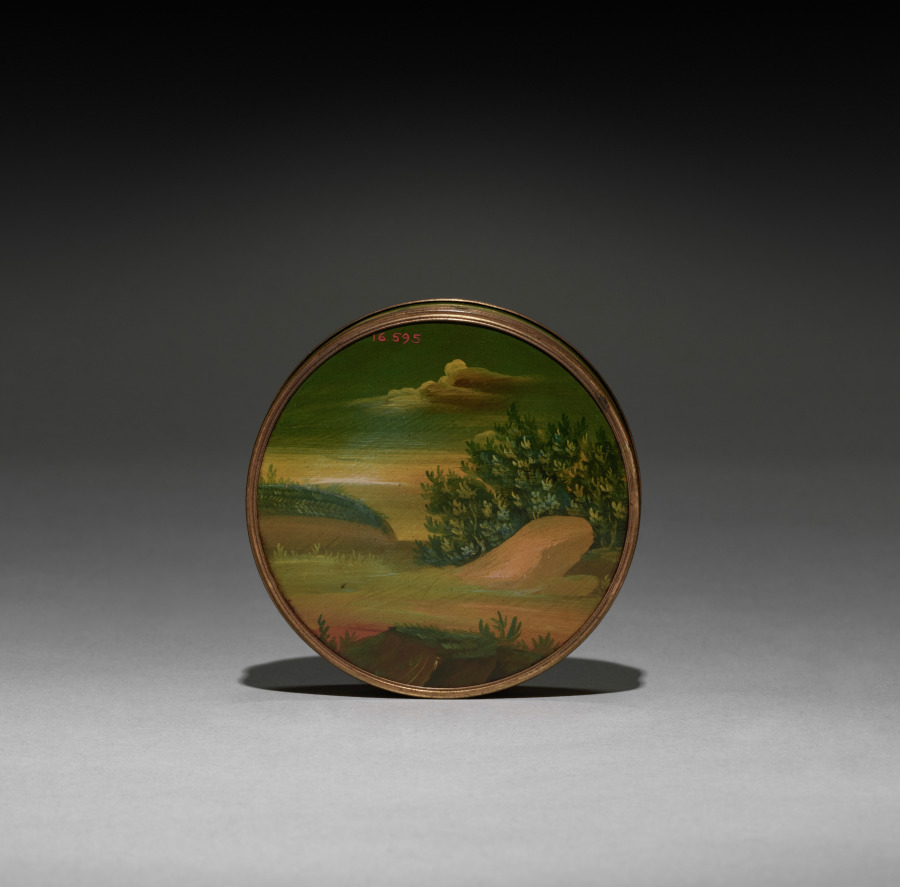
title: Box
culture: France, 18th century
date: 1700s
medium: lacquer with tortoiseshell lining, gilt metal mounts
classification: Miscellaneous